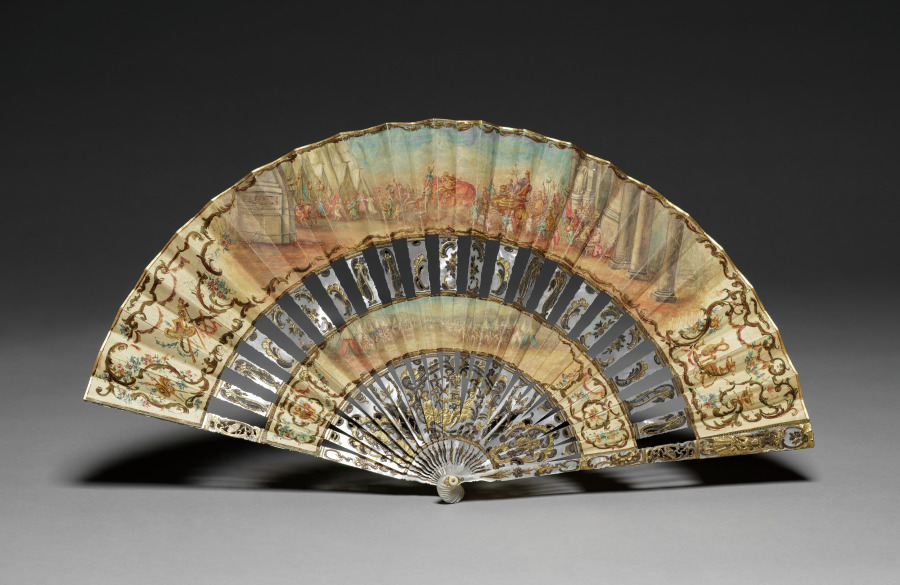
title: Fan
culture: France, 18th century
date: c. 1750–1760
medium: mother-of-pearl, painted paper (?), gold and silver leaf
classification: Miscellaneous